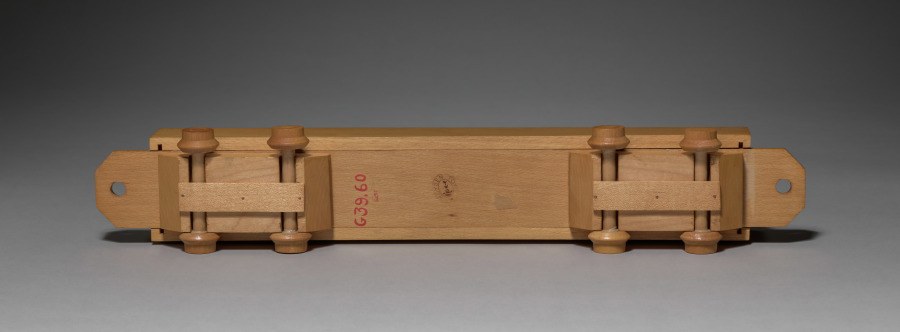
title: Train Car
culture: Denmark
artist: Boysen Toys (Danish)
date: 1900s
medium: wood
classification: Wood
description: Credit line: John D. Rockefeller General Education Board Grant II